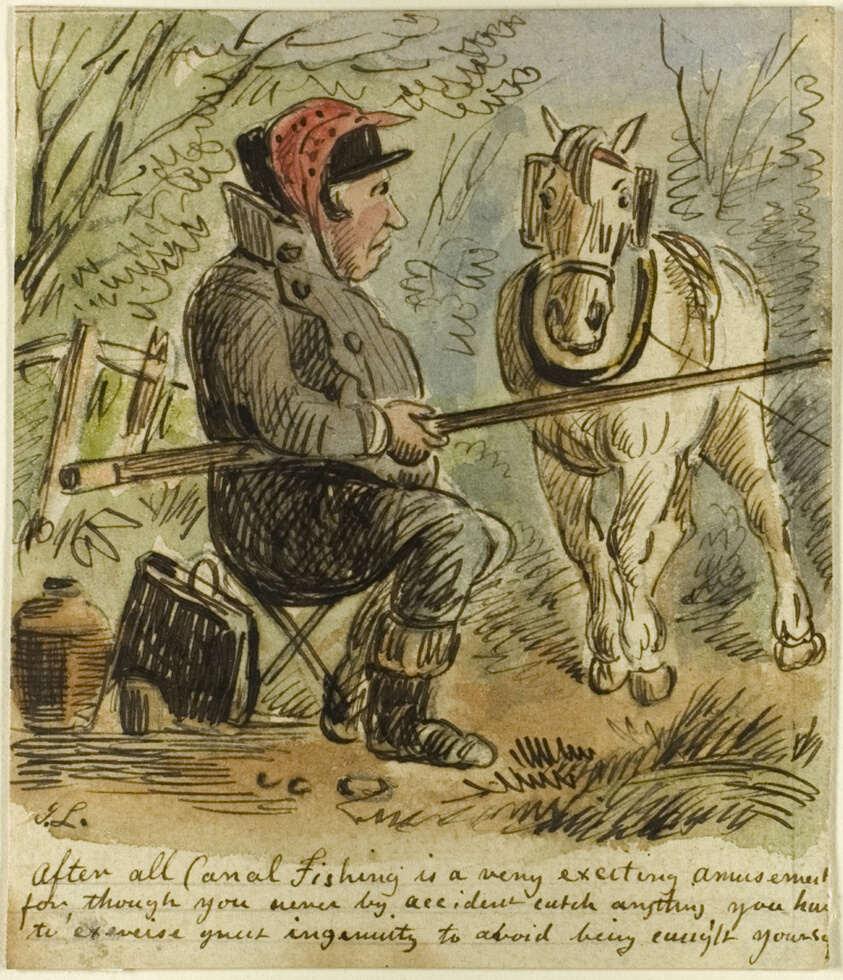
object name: Drawing and Watercolor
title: Canal Fishing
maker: John Leech (English, 1817-1864)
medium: Watercolor and pen and brown ink, over graphite, on cream wove paper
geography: England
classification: watercolor; drawings (visual works); prints and drawing